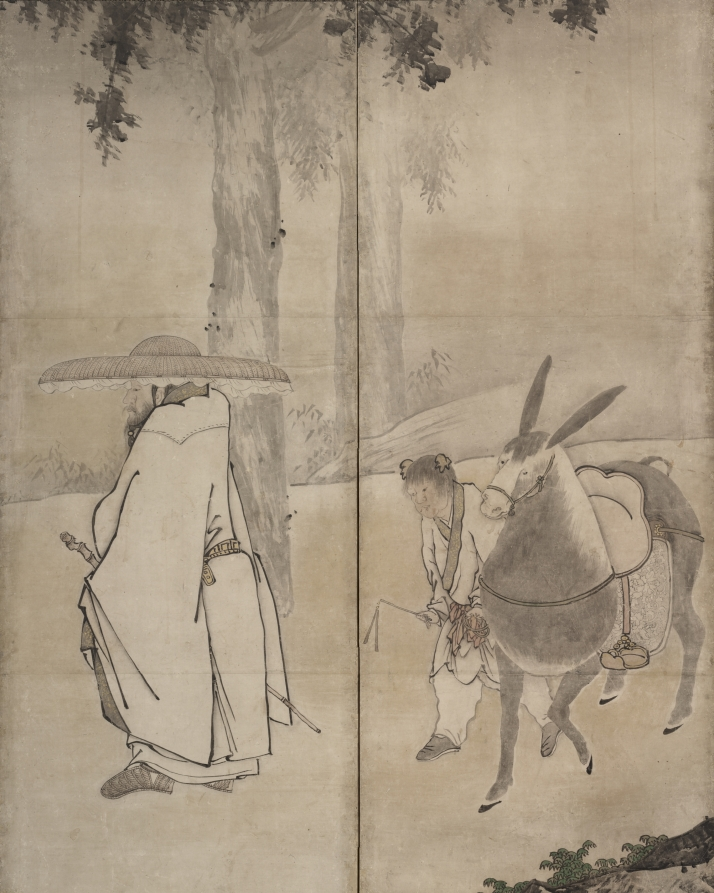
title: Su Shi (So Shoku)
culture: Japan, Momoyama period (1573–1615)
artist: Unkoku Tōgan (Japanese, 1547–1618)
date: early 1600s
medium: one of a pair of six-panel folding screens; ink, light color, and gold on paper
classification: Painting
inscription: Each screen in the pair is impressed with two seals arranged vertically, a round "Unkoku" seal above and square "Togan" seal below.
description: This pair of screens depicts episodes from the stories of famed Song-dynasty poets Su Shi of the 1000s and Zhou-dynasty official Pan Lang of the 900s. Both men were banished by their rulers for their perceived missteps. Su Shi’s comments on a series of economic reforms were seen as criticism of the emperor. Pan Lang composed an ill-advised verse about one of the king’s horses. In the left screen Pan rides backward on his donkey as he returns from exile so that he may have a last look at his now beloved Mount Hua. Su Shi, in the right screen, is shown embarking on his journey into exile. The artist of these screens, Unkoku Tōgan, was the founder of the Unkoku school of painting, which emulated the style of renowned ink painter Sesshū Tōyō (1420–1506). Tōgan was the official painter of the Mori family of what is now Yamaguchi prefecture in the south of Japan.